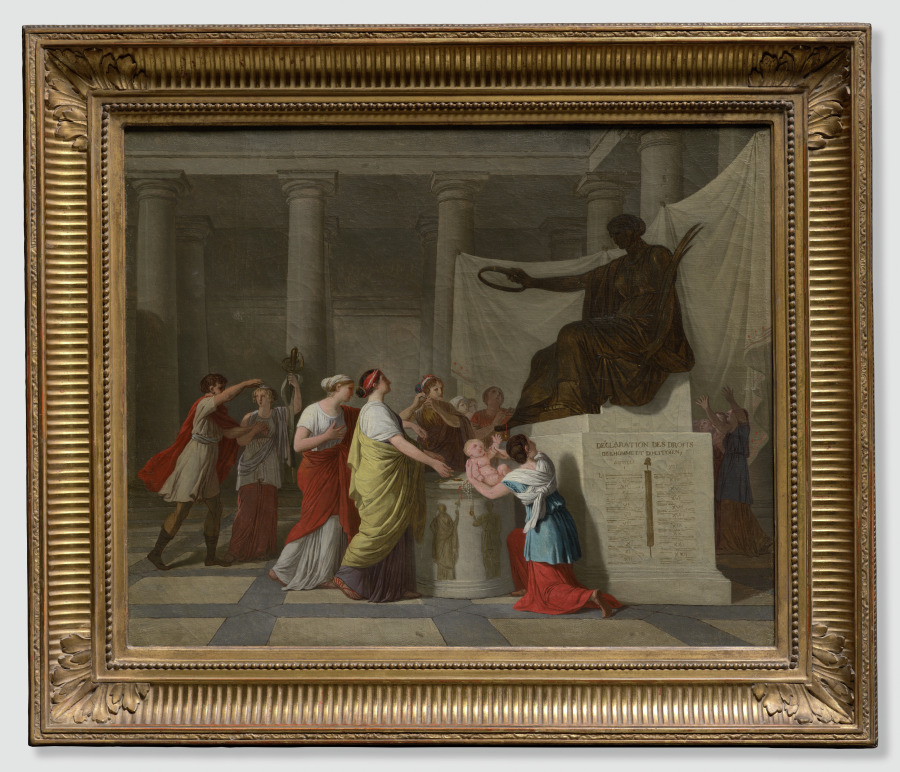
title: Le Dévouement des Citoyennes de Paris (The Dedication of the Citizens of Paris)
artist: Joseph-Benoît Suvée (French, 1743–1807)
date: 1794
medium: Oil on canvas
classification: Painting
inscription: DECLARATION DES DROITS/DE L’HOMME ET DU CITOIEN/ARTICLE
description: Painted during the French Revolution’s treacherous Reign of Terror, the artist took inspiration from an actual event. In 1789, wives and daughters of several prominent artists donated their jewelry to the service of the young French republic. Joseph-Benoit Suvée recasts the event in classical Roman style, underscoring the connection between the ancient republic and France’s revolutionary ambitions.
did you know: Shortly after submitting this sketch, the artist was imprisoned for not being sufficiently loyal to the republic.